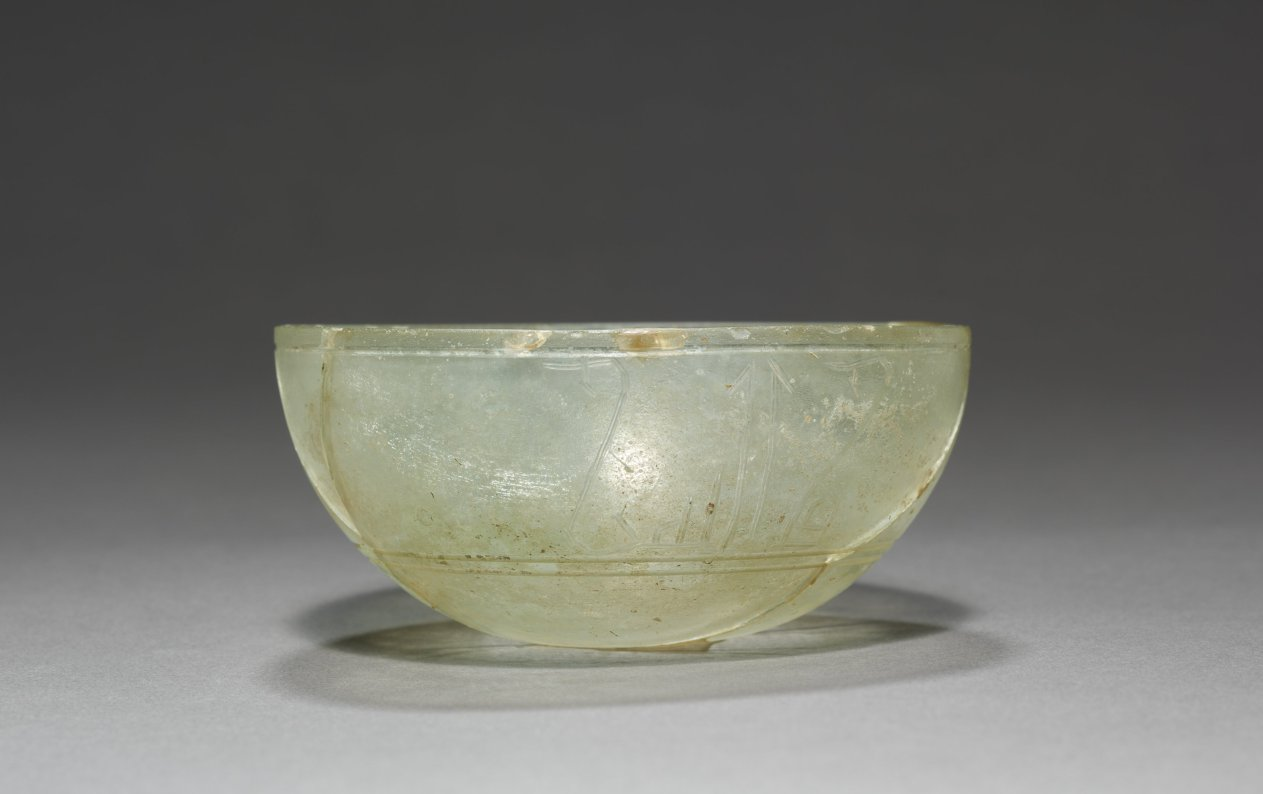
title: Bowl with Incised Inscription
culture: Iraq, Abbasid Period, 9th Century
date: 800s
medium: glass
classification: Glass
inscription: The inscription translates: "Felicity, Glory, Happiness"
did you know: The incised inscription, which translates as "Felicity, Glory, Happiness," is an early type of Kufic of which very few examples survive.